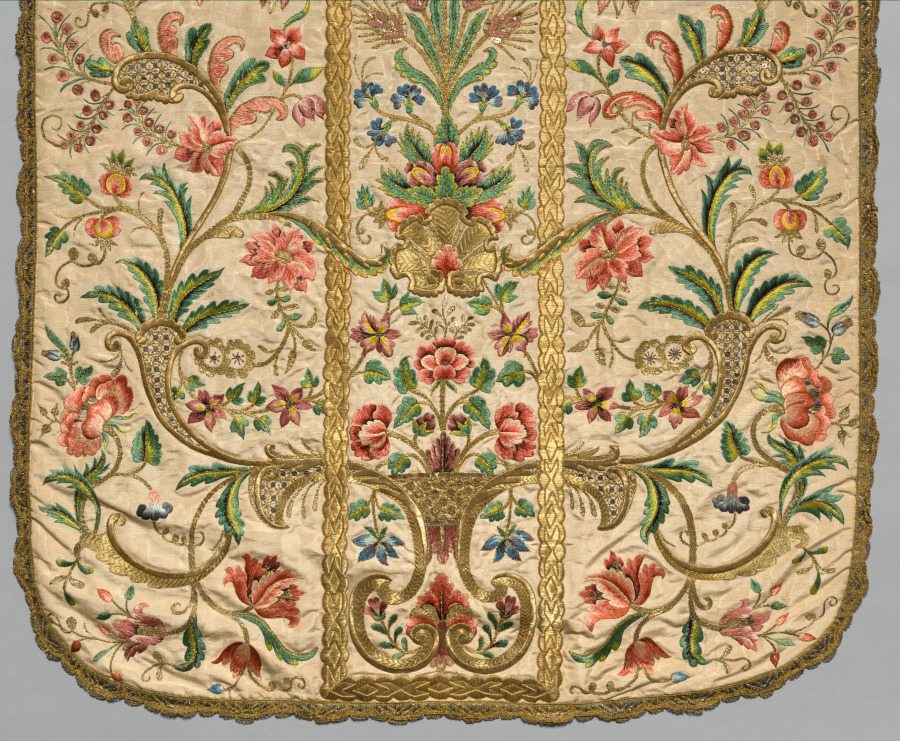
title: Chasuble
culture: Italy, 18th century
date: 1700s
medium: Silk and metallic threads; embroidery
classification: Textile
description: A beautiful design emanates from a vase in the center of this chasuble, displaying symmetrical flora that extend across embroidered gold braids into graceful curvilinear cartouches, reflecting contemporary architectural decoration. Also in the center, sheaves of wheat and grapes represent the bread and wine of the Mass. Gold sequins within thread-outlined squares illustrate fine quality workmanship. The decoration of the stole and chalice veil is similar to the chasuble, also on moiré (watered) silk fabric. The stole, an insignia of the office of deacons and priests, is worn under a chasuble, and the chalice veil—bearing the monogram of Jesus Christ, ihs, in the center—covers the chalice and paten (the plate holding the Eucharistic bread).